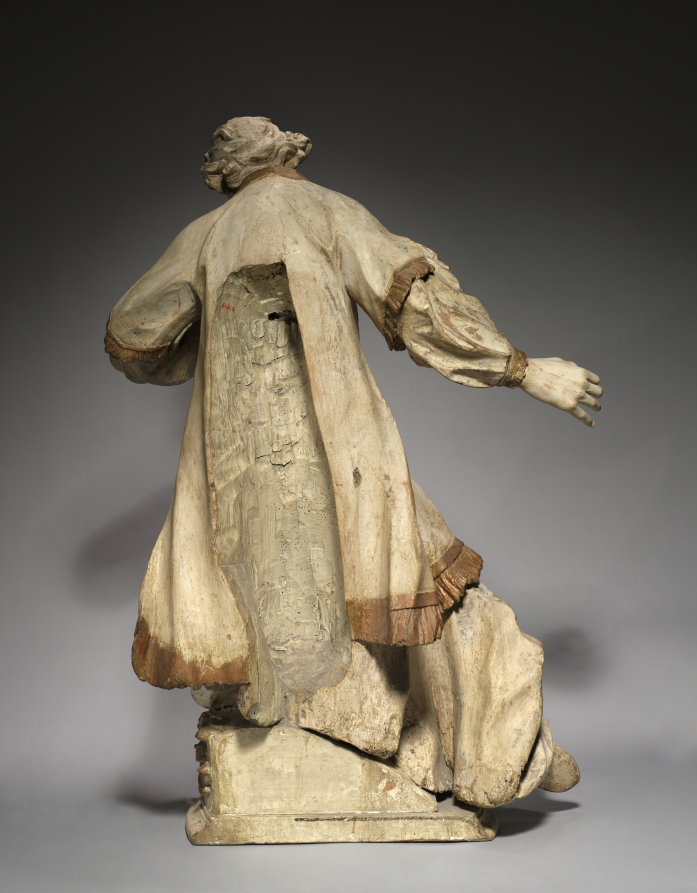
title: Kneeling Saint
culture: Germany, Munich, second half 18th century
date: 1750–1800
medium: painted and gilded wood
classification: Sculpture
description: This serene figure would originally have been part of a larger group, perhaps shown kneeling in adoration of Christ or the Virgin. He wears a knee-length dalmatic, the ecclesiastical dress of deacons (ordained ministers in the Catholic Church). Saints Lawrence and Stephen were among the most popular deacon saints, but lacking an identifying attribute—probably once attached to the saint’s outstretched hand—it is not possible to associate this figure with a specific saint.